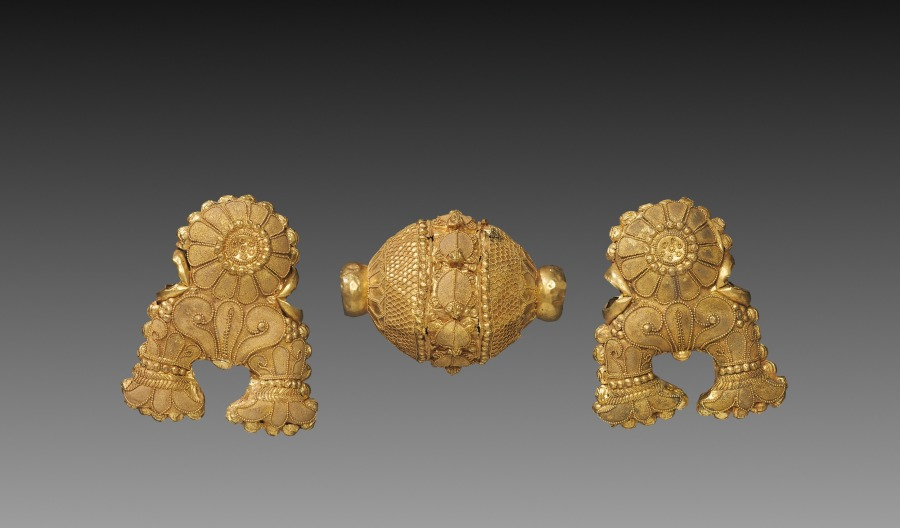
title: Necklace Bead and Pair of Pendants in the Shape of an Auspicious Symbol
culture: India, Uttar Pradesh or Madhya Pradesh, Shunga period (185–78 BCE)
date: c. 150 BCE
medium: gold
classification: Jewelry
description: These exceptionally fine pieces of gold jewelry would have been strung on a necklace. The auspicious symbols on either side of the egg-shaped bead are in the form of full blown lotus flowers with the seed pods carefully detailed, and trident-shaped forms decorated with stylized palmette motifs emanate down from the lotuses.